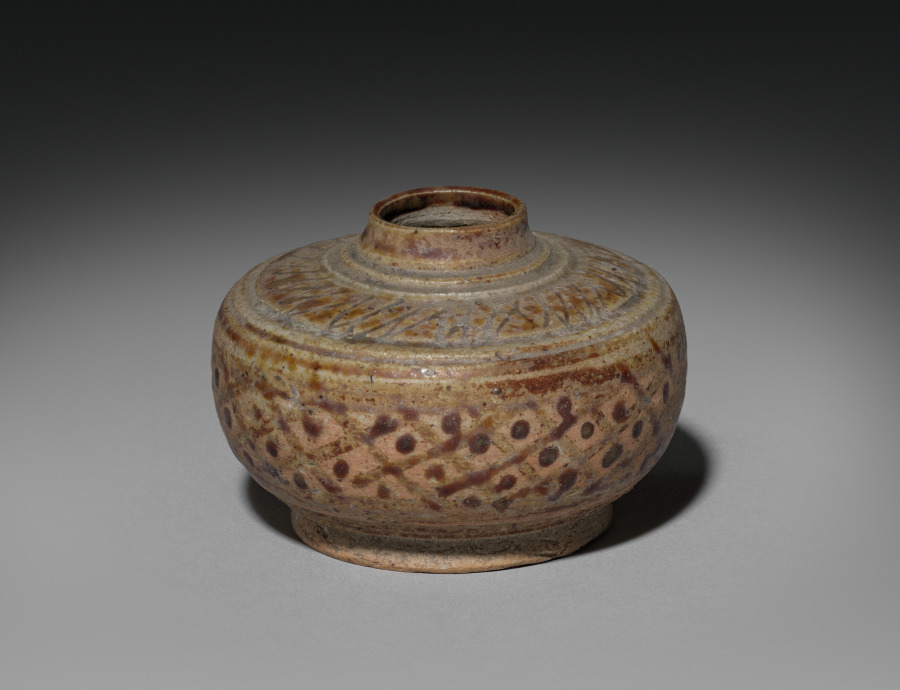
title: Bottle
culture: Siam, Sawankhalok ware, 15th century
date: 1400s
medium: stoneware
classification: Ceramic